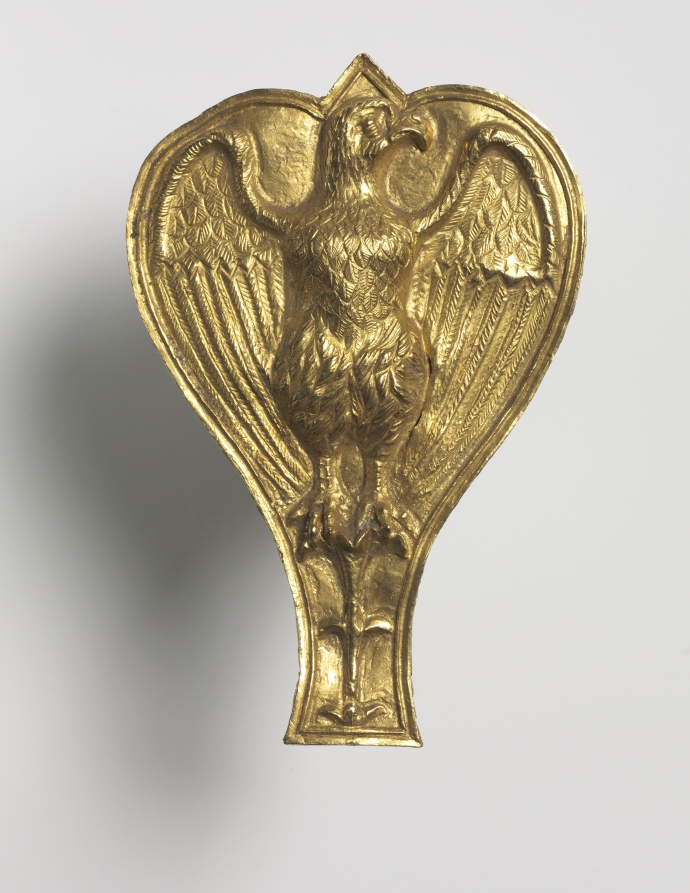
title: Ornament with Eagle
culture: Italy, Roman, Imperial Roman period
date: 1–300 CE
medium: gold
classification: Metalwork